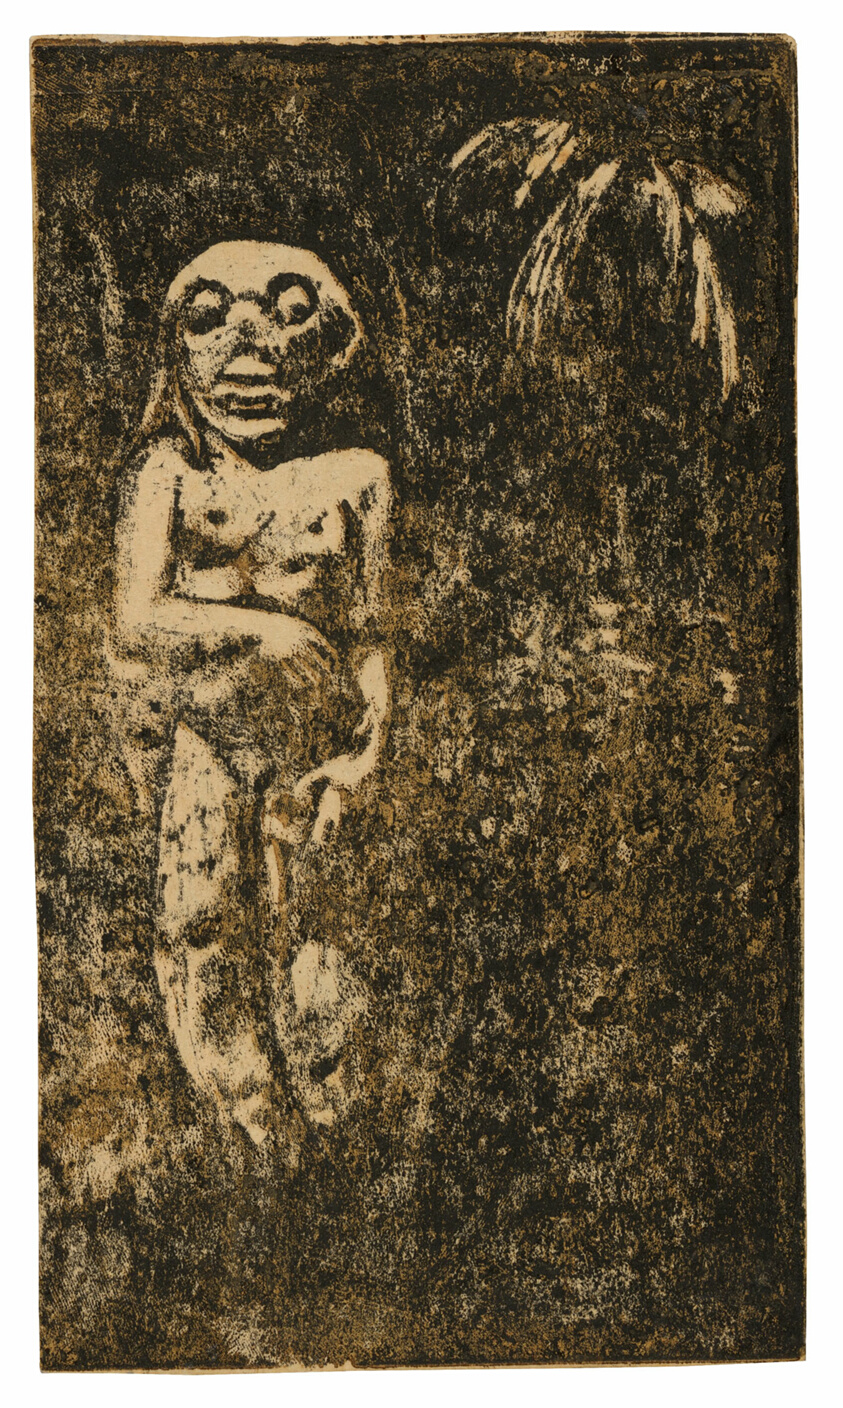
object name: Print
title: Oviri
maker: Paul Gauguin (French, 1848-1903)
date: 1894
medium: Wood-block print, printed twice in deep-yellow ocher and black ink, on cream wove paper (an imitation Japanese vellum), mounted on mottled blue wove laminate card (recto); wood-block print in black ink over red ink tone block, and brush and solvent-thinned orange wash, on cream wove paper (an imitation Japanese vellum) mounted on mottled blue wove laminate card (verso)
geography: France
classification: woodcut; print; prints and drawing